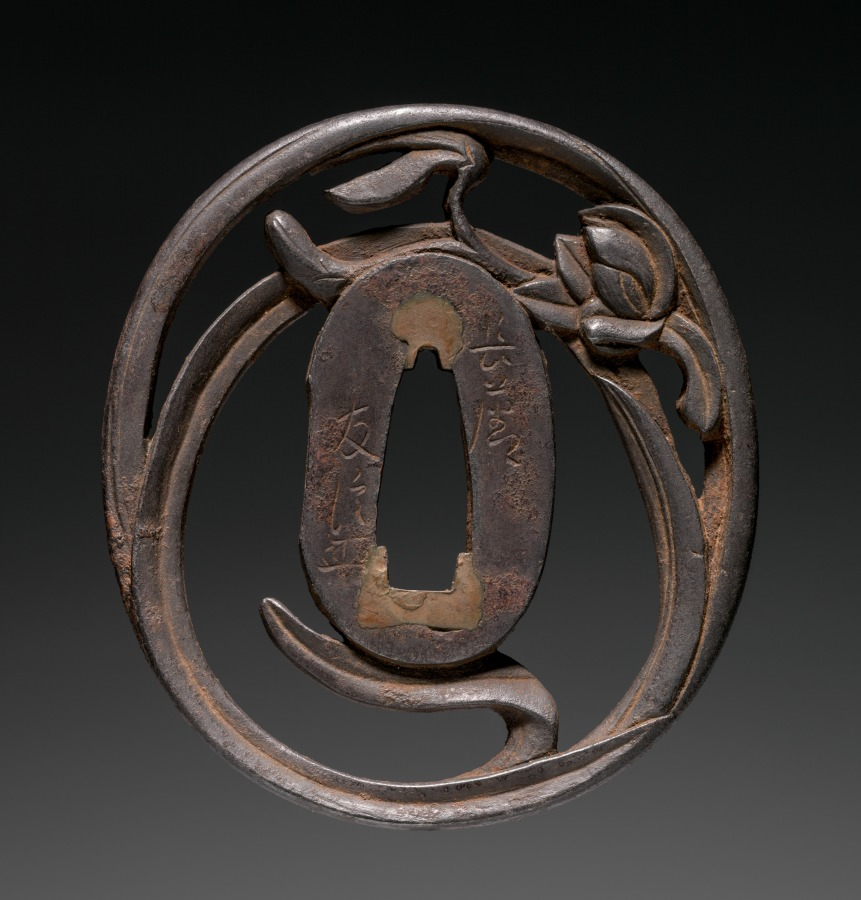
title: Sword Guard (Tsuba)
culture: Japan, Edo period (1615–1868)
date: c. 1750–75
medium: iron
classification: Arms and Armor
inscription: Signature: Tomonobu